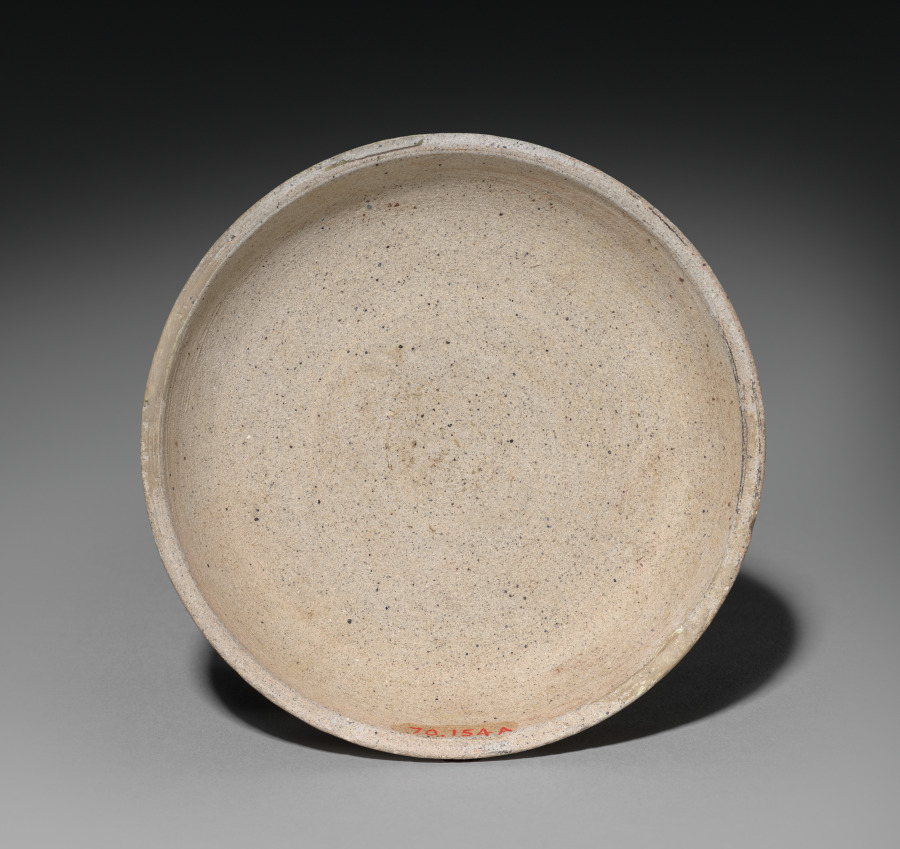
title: Covered Jar, Sawankhalok ware (lid)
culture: Thailand, Sukhothai Period, 14th century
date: 1300s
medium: pottery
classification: Ceramic